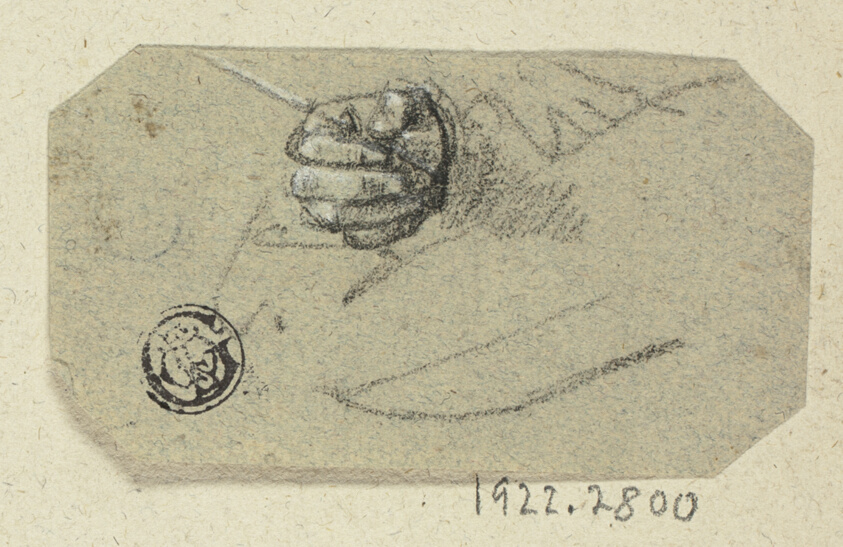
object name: Drawing and Watercolor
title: Right Hand Holding Drawing Implement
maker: Unknown Artist; British, 19th century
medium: Black chalk, heightened with touches of white chalk, on gray laid paper with blue fibers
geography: United Kingdom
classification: chalk; drawings (visual works); prints and drawing; paper